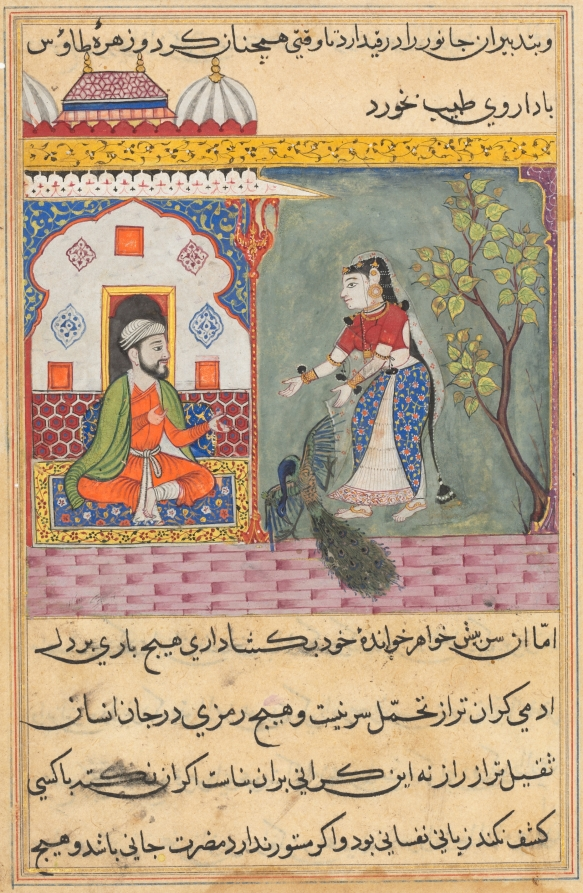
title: The Brahman’s wife who killed a peacock and ate its gallbladder on the physician’s advice, from a Tuti-nama (Tales of a Parrot): Nineteenth Night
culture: Mughal India, court of Akbar (reigned 1556–1605)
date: c. 1560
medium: gum tempera, ink, and gold on paper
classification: Painting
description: The Brahman’s wife stands over the body of the Raja’s dead peacock, which she killed in hopes of finding a cure for her infertility. The woman’s crime was nearly discovered, but she ultimately saved herself with a cunning lie. The physician, wearing orange and green, sits in the chamber on the left.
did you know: The gold square on the long black cord around the woman’s neck is an amulet.